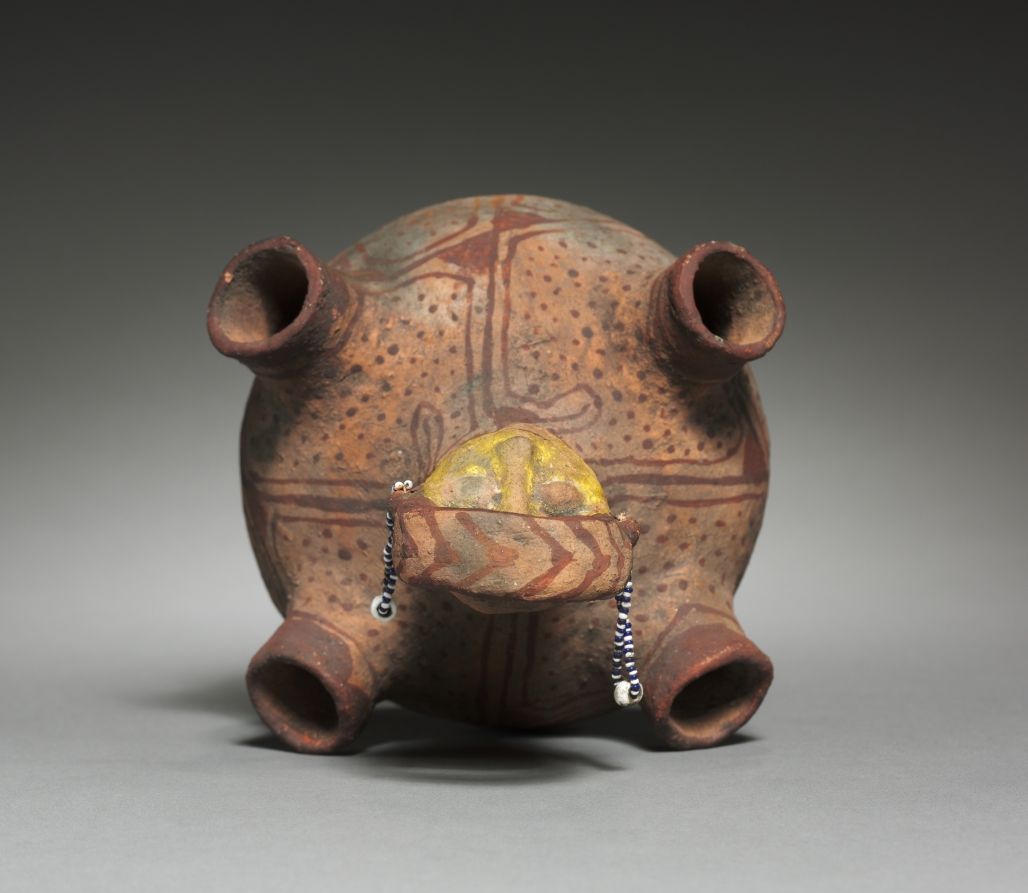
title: Vessel with Four Spouts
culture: Great Basin, Pueblo, Mojave, Post-Contact Period, early 19th century?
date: early 1800s?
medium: ceramic, pigment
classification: Ceramic